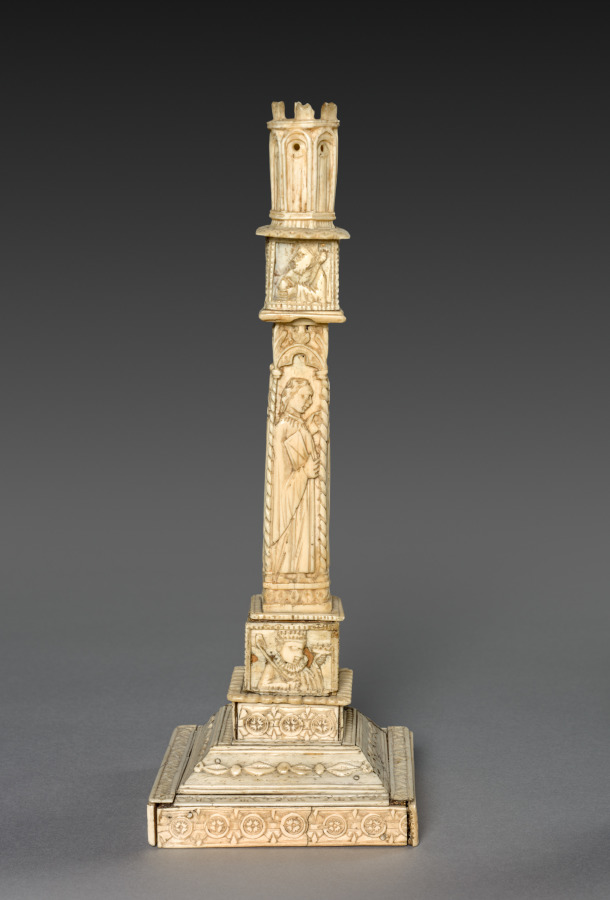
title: Candlestick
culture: Italy, 15th century style (possibly 19th-early 20th century)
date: 1800s - early 1900s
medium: ivory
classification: Ivory